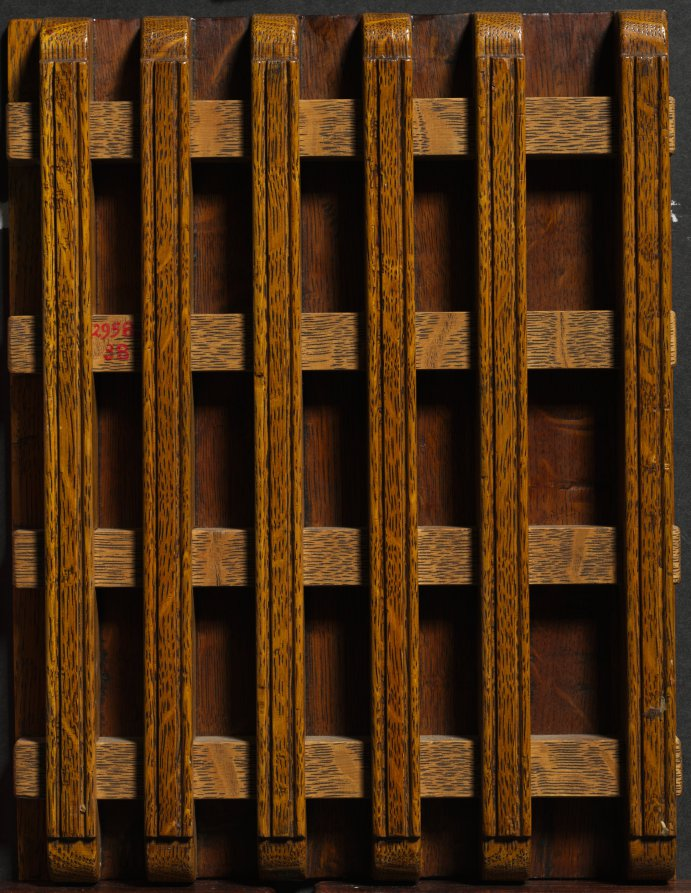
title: Imaginary View of Arnhem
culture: Netherlands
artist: George Andries Roth (Dutch, 1809–1887)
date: late 1830s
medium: oil on wood panel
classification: Painting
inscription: Signed lower right: g. a. roth. [written at an angle at the top of the cornerstones that form the edge of the quay in the lower right foreground]